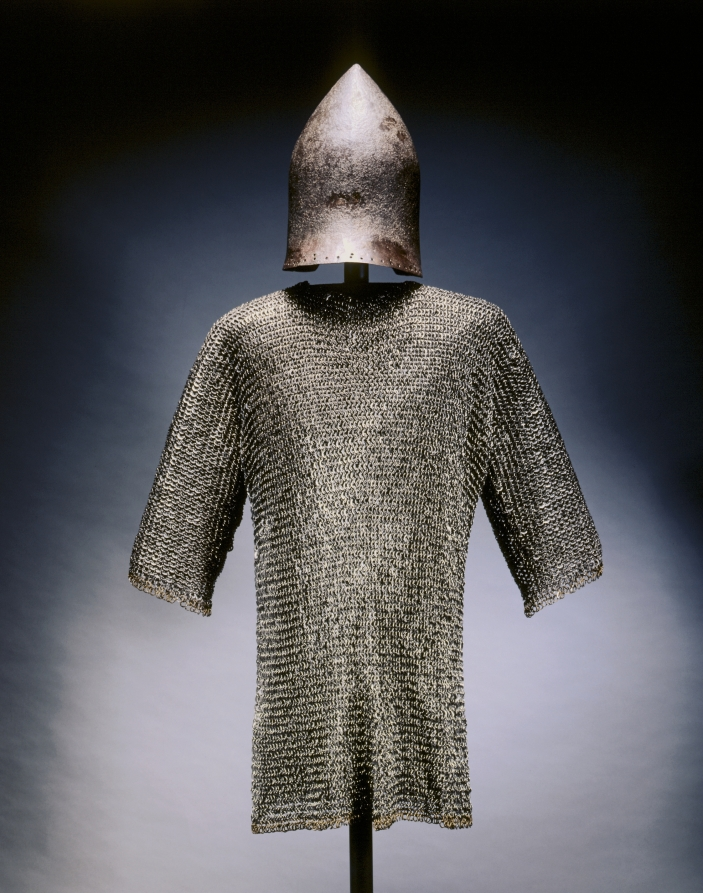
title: Barbute (from the Venetian Garrison at Chalcis)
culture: North Italy, 14th-15th century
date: c. 1350–1420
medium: iron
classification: Arms and Armor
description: This is a rare example of a type of helmet used from about 1350 to 1480. Its conical shape deflected glancing blows to the head. Italian chronicles refer to professional men-at-arms as barbuti. The word derives from the Italian barba, or beard, a reference to the hood of mail often attached to these early helmets. The row of small holes along the face opening and neck were for the attachment of the hood and lining.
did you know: This helmet and a number of others were apparently excavated from the Venetian garrison at Chalcis on the Greek island of Euboea.